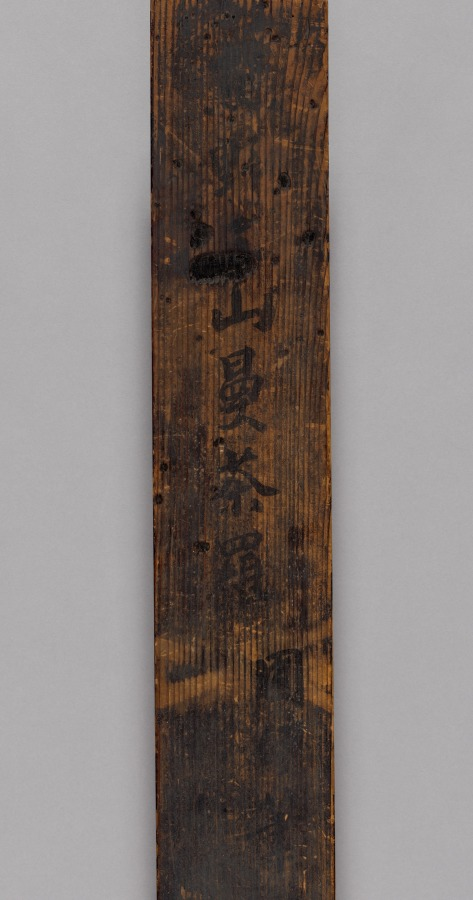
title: Mandala of the Three Shrines at Kumano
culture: Japan, Kamakura period (1185–1333) to Nanbokuchō period (1336–92)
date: 1300s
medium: hanging scroll; ink and color on silk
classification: Painting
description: This painting depicts the three shrines of Kumano from a bird’s-eye perspective, with the Buddhist counterparts of the kami of each shrine hall shown in discs directly above the halls. It also features figures, both pilgrims and deities, along the pilgrimage route and at the shrines. It is the only surviving work illustrating architectural representations of all three shrines in the same painting. They are compressed into a stacked composition, with the Nachi shrine at the top, the Shingū in the middle, and the Hongū at the bottom.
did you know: The sacred waterfall at the top right of the painting is called Nachi.